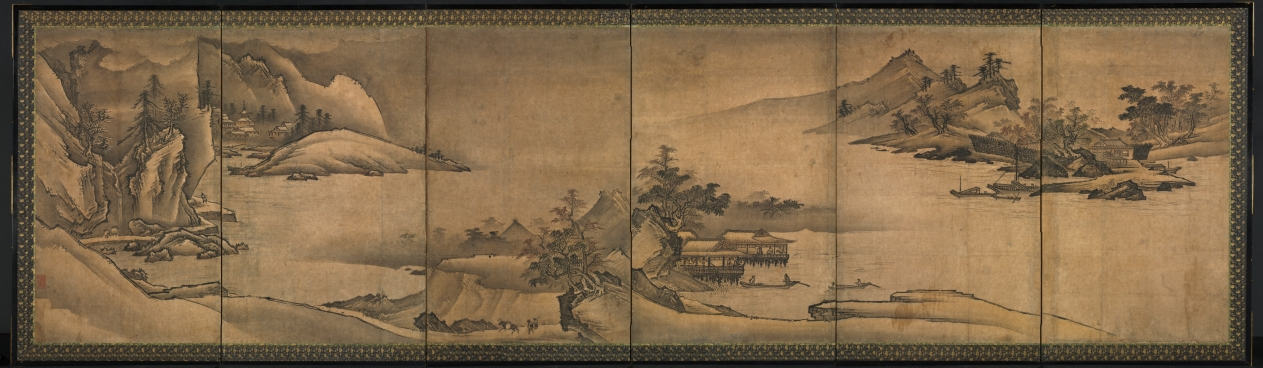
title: Landscape of the Four Seasons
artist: Yi Sumun (Korean, b. c. 1404)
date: late 1400s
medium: One of a pair of six-panel screens; ink and slight color on paper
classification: Painting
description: Yi Sumun is believed to have been a Korean painter who migrated to Japan in 1424 at the age of 20. This pair of screens is the artist’s most important composition in this format. Viewed from right to left, the screens show the passage of the four seasons, a popular theme in medieval Japanese ink painting.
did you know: Yi Sumun is believed to have been a Korean man who moved to Japan at the age of 20 and became an influential landscape painter in Japan.